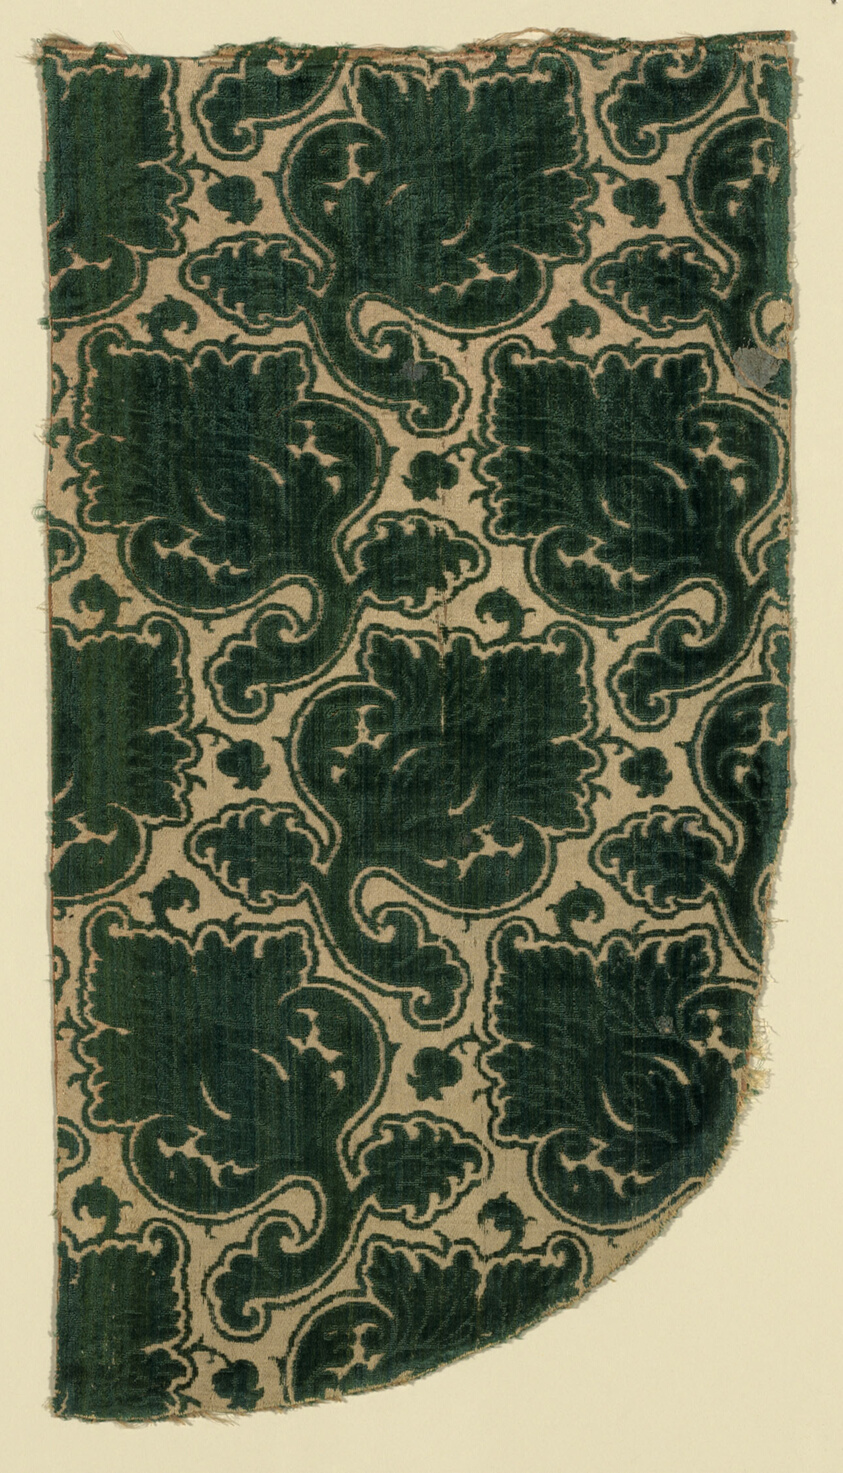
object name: Textile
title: Fragment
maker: Italy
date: 1601/50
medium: Silk, warp-float faced satin weave with supplementary pile warps forming cut, uncut, and voided velvet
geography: Italy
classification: textile; weaving - velvet; weaving